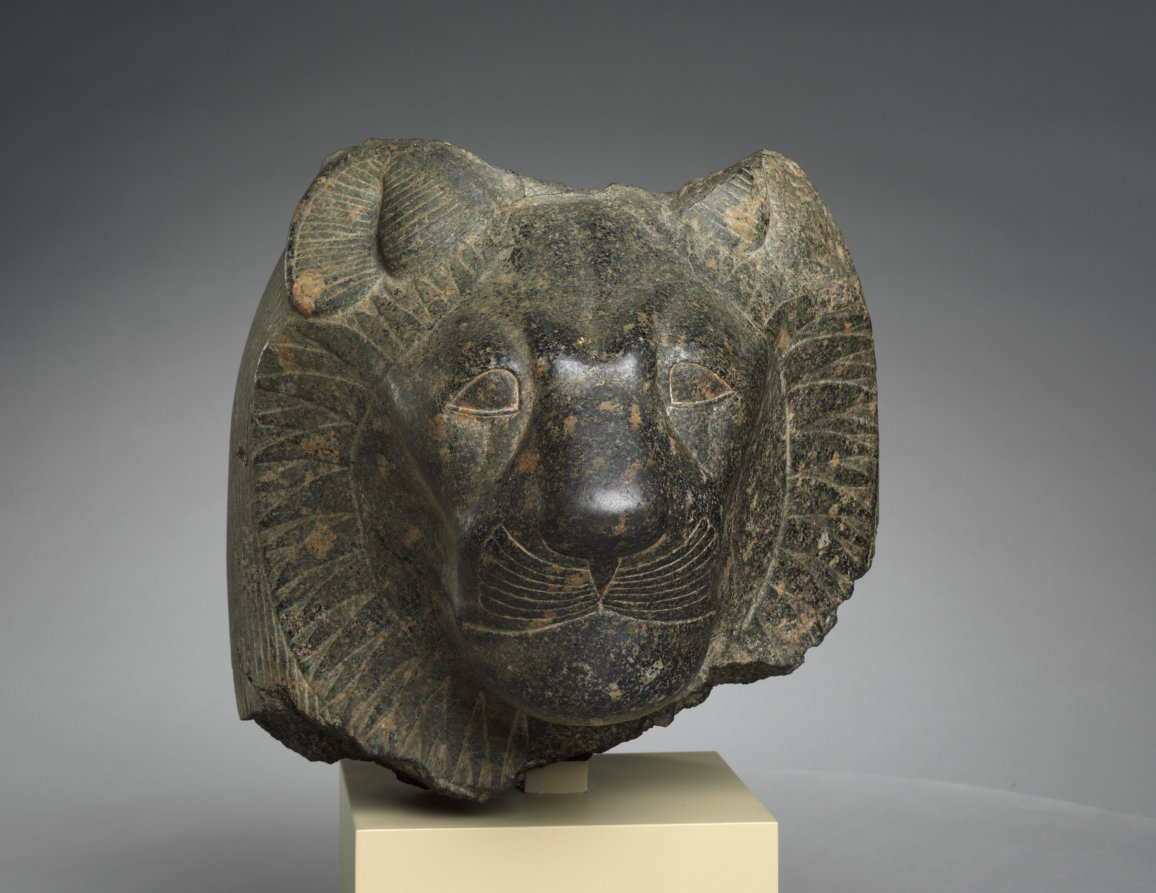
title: Head of Sekhmet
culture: Egypt, Thebes(?), New Kingdom (1540–1069 BCE), Dynasty 18, reign of Amenhotep III (1390–1352 BCE)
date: c. 1391–1353 BCE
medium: granodiorite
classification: Sculpture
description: This lioness head once belonged to a grand statue of the goddess Sekhmet, "the powerful one," probably seated and wearing a tight dress. Possibly appealing to her healing aspect, Pharaoh Amenhotep III, often described as “beloved of Sekhmet,” commissioned and dedicated hundreds of large granodiorite Sekhmet sculptures in his Theban mortuary temple. Thus, this head likely comes from Thebes, perhaps later moved across the Nile—like many such sculptures—to the temple of Mut, a related deity, at Karnak. Behind her stylized ruff, Sekhmet wears a wig, once crowned with a sun disk and uraeus, the stylized cobra symbolizing royal or divine power.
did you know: Amenhotep III may have dedicated 730 statues of Sekhmet, two for each day of the year.